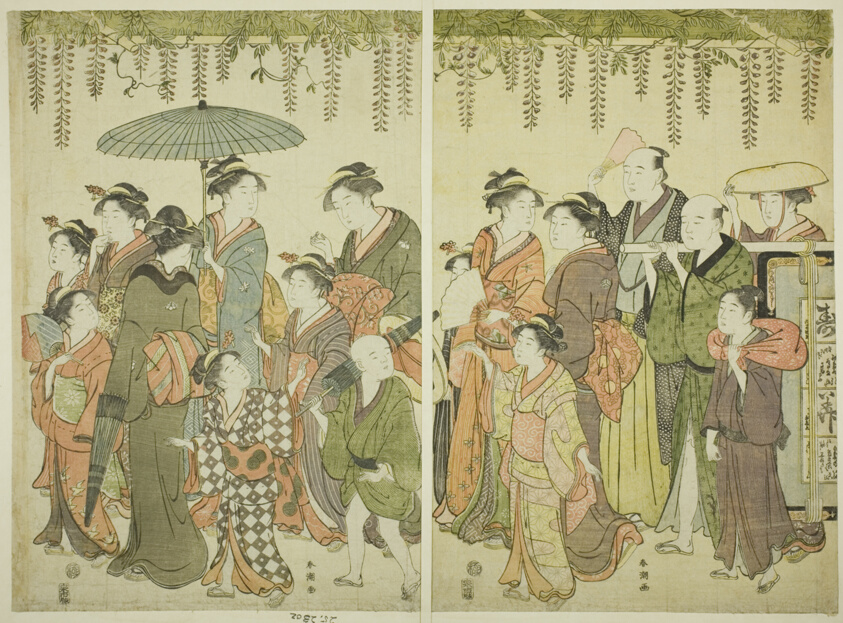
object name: Print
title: Votive Offering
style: Japanese (culture or style)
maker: Katsukawa Shuncho; Japanese, active c. 1780-1801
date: 1780s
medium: Color woodblock print; two sheets of oban pentaptych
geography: Japan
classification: woodblock print; print; asian art